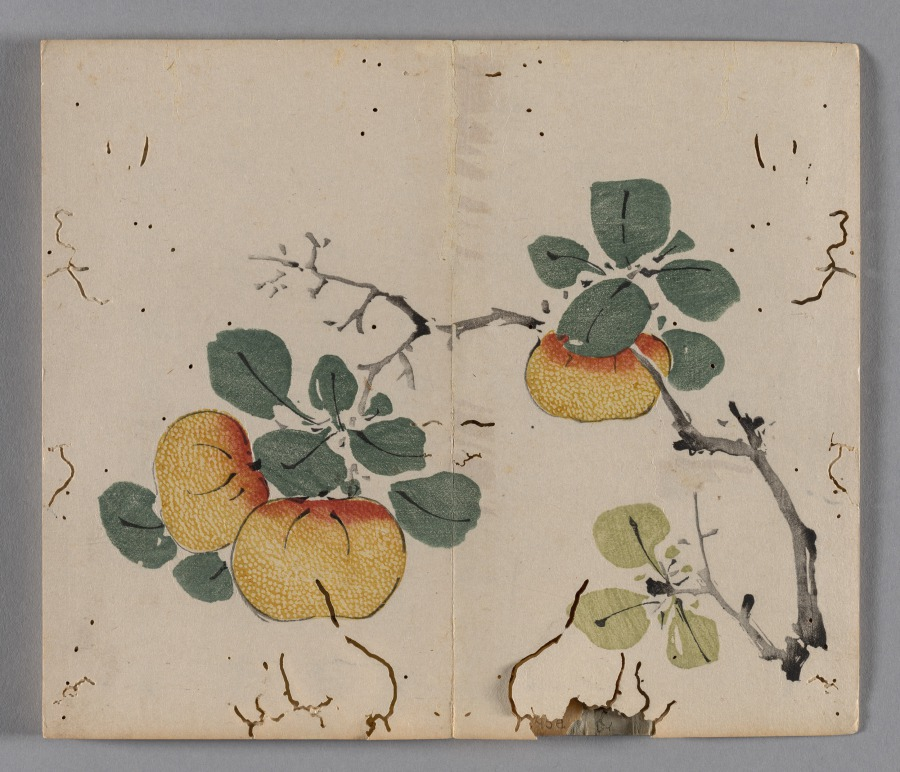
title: Ten Bamboo Studio Painting and Calligraphy Handbook (Shizhuzhai shuhua pu): Fruit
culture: China, Qing dynasty (1644-1911)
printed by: Hu Zhengyan (Chinese, c. 1584–1674)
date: 1633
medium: Woodblock-printed book; ink and colors on paper; first edition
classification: Print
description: Color printing reached a level of perfection in the early 1600s, as seen in this Ten Bamboo Studio Collection of Calligraphy and Painting and the Mustard Seed Garden Manual of Painting (printed 1679 and 1701). The painterly quality, precision in registering (aligning) the woodblocks, and harmonious colors made them the most successful color print editions in Chinese history. Both editions were printed and compiled in Nanjing, spread nationwide, and had a great impact on the arts in Japan and Korea.